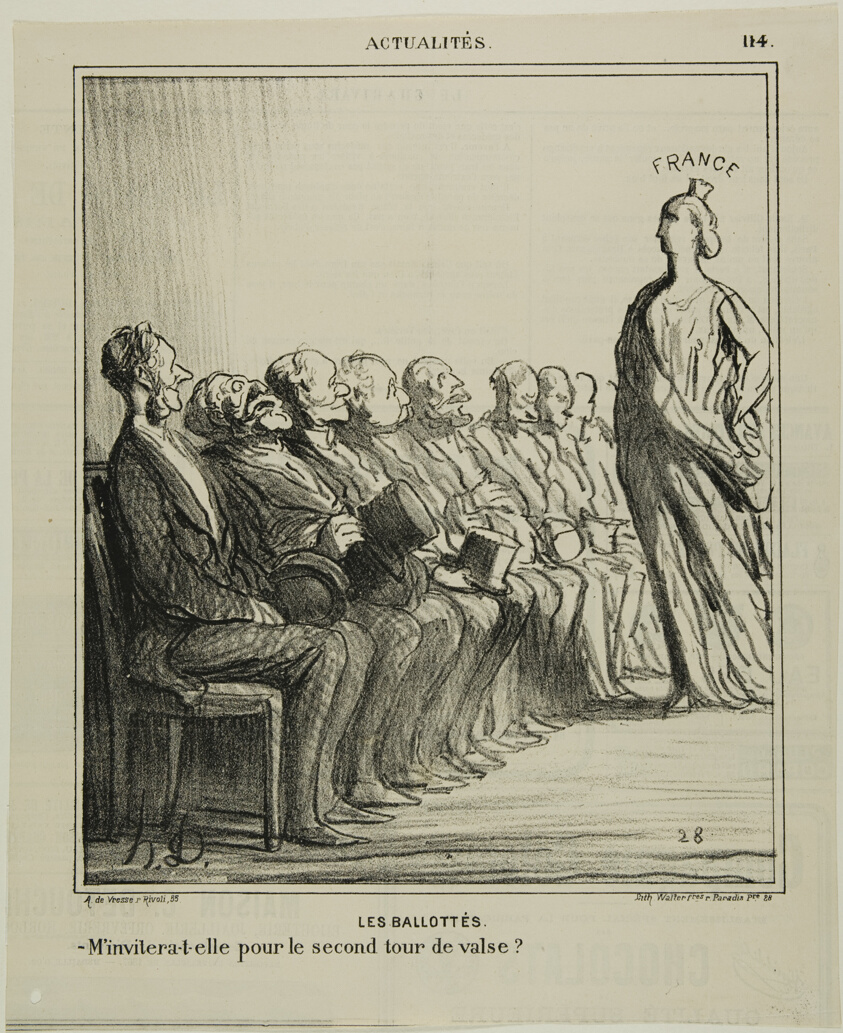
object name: Print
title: Run-Off Elections. “- Will she invite me for a second waltz?,” plate 114 from Actualités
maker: Honoré Victorin Daumier; French, 1808-1879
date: 1869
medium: Lithograph in black on buff wove paper, with letterpress verso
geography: France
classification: lithograph; print; prints and drawing